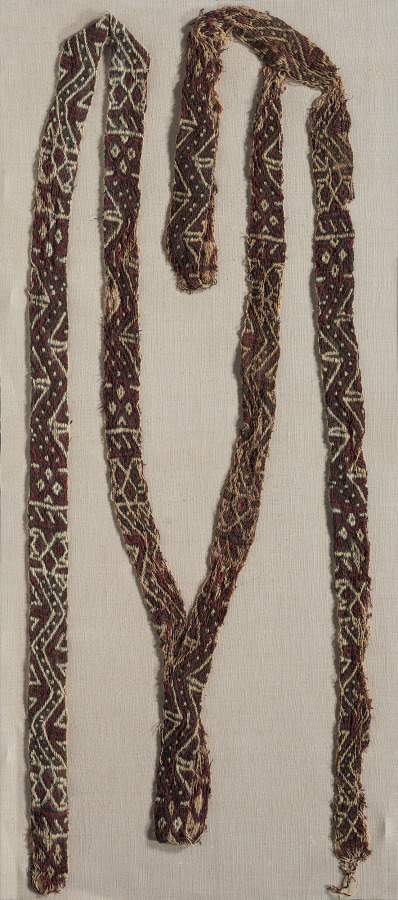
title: Band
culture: Peru, Central Coast?, Lima?, Early Horizon?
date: c. 600–400 BCE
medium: warp-faced weave: llama wool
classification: Textile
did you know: The double-headed serpent is one of the oldest and most enduring motifs of the ancient Andes.